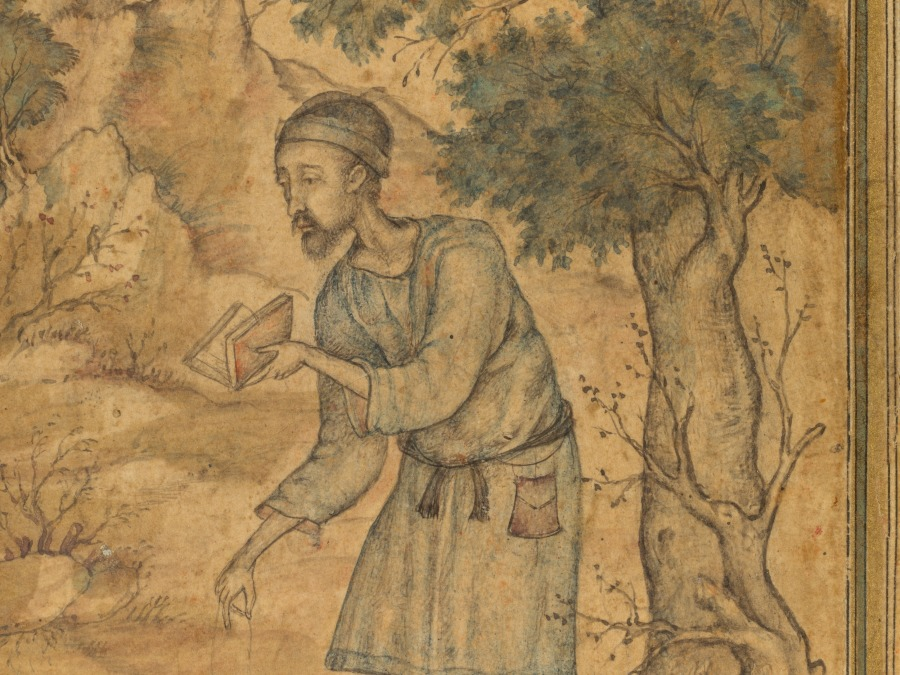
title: A mendicant bowing before a holy man, from the Prince Salim Album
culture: Mughal India, court of Akbar (reigned 1556–1605)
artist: Basavana (Indian, active c. 1560–1600)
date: c. 1585; inner border added in Allahabad c. 1602; outer border added probably 1900s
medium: Gum tempera, ink, and gold on paper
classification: Painting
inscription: Persian inscription on mendicant’s bowl, in nasta‘liq script: the work of Basavana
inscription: Persian verse at top from a ghazal (lyrical poem) of Hafiz (Persian, 1325–1389), in nasta‘liq script: I have fallen at his feet, grieving and wailing./ Could it be that I might receive a helping hand?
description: As the Mughal atelier grew into the 1580s, Indian artists become increasingly adept at incorporating Persian styles with a new dimensionality and naturalism that Akbar promoted, possibly based on his appreciation of European prints and paintings. Here, a sincere holy man wears robes tinged lightly with blue. He stands beneath a tree in the wilderness with a loyal jackal by his side. A devotee touches his head to his feet. The artist’s tiny signature is written on the alms bowl. Connoisseurs of Persian art in the Islamic world praised an artist’s virtuoso ability to work on a microscopic scale.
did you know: The dog stares hungrily at the mendicant’s alms bowl, with the artist’s signature.